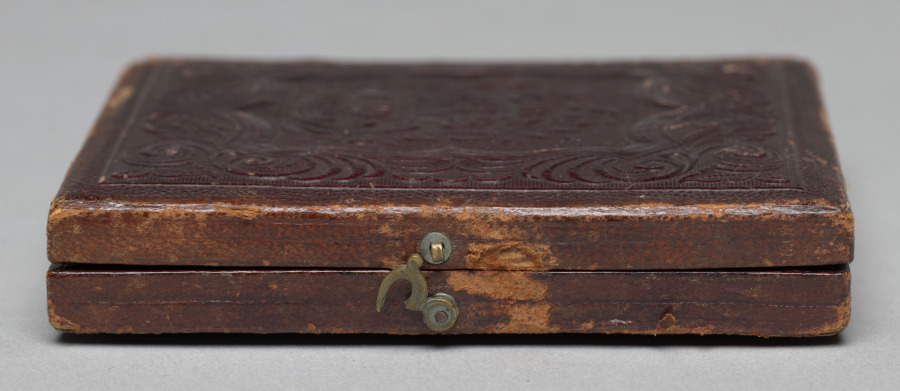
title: Mother with son with blind right eye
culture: America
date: c. 1855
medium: daguerreotype, sixth plate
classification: Photograph